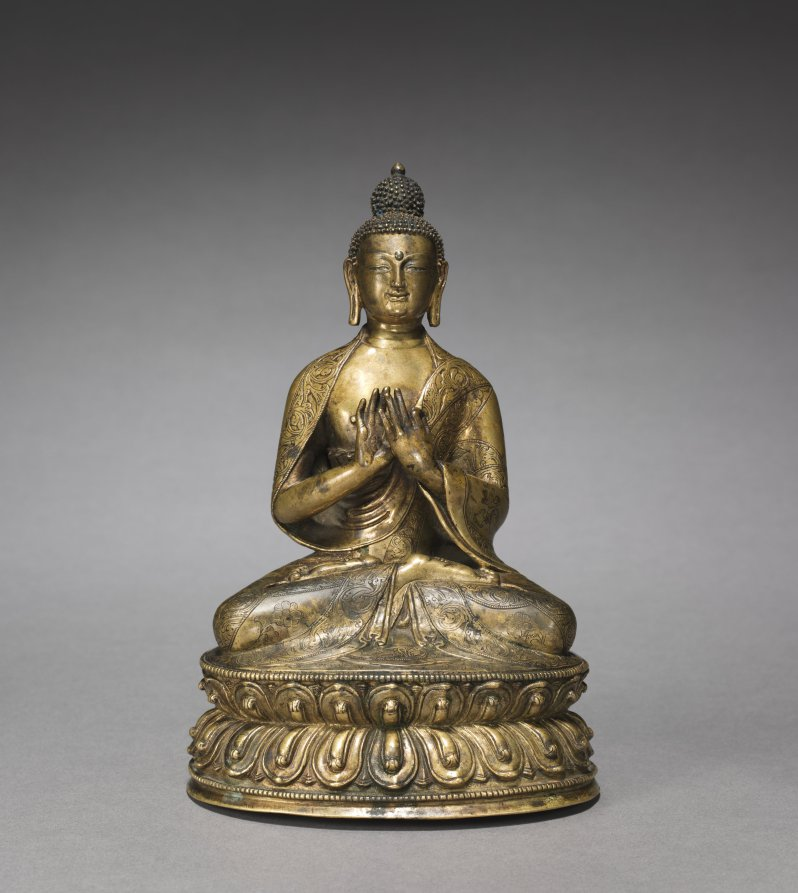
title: Seated Maitreya Buddha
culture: Western Tibet, Yongle Period (1403-1424)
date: c. 1400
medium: bronze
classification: Sculpture